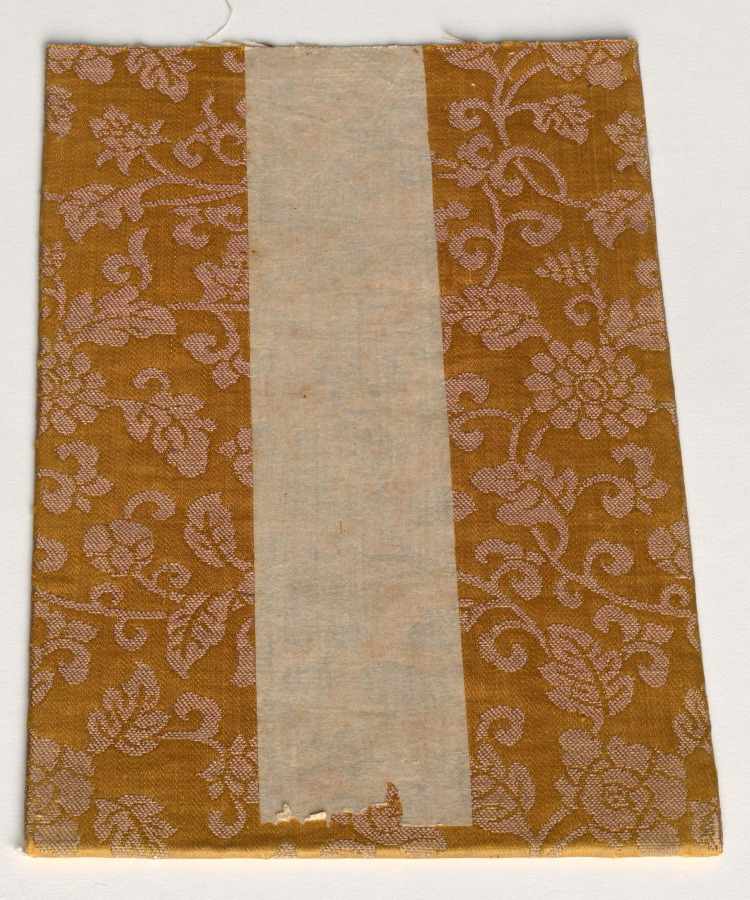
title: Textile Book Cover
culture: Japan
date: 1800s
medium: silk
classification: Textile